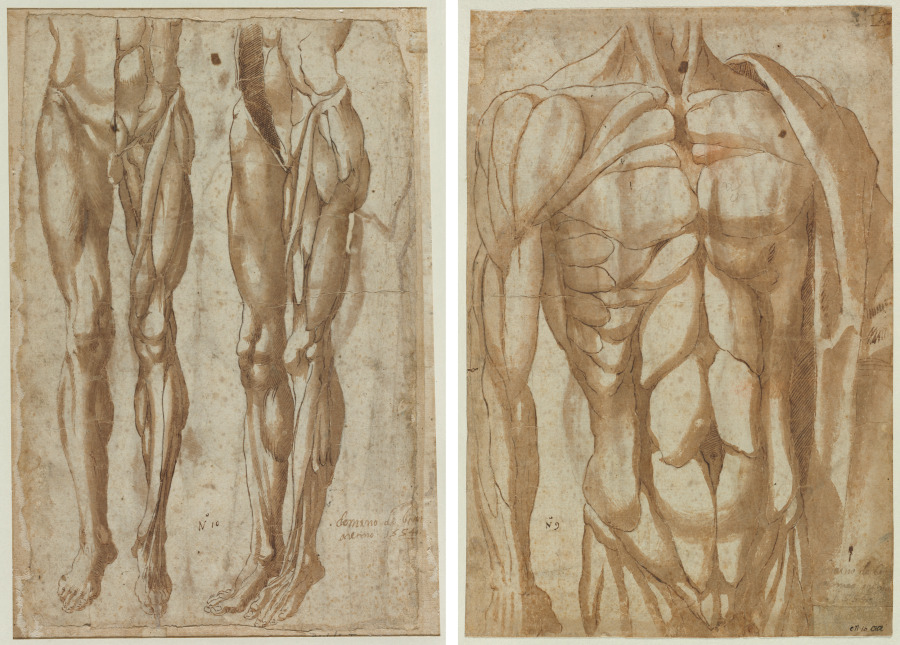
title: Two Studies of a Flayed Man (recto) Study of a Flayed Torso (verso)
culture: Italy, 16th century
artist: Bartolommeo da Arezzo (Italian, active about 1550–80)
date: 1554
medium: pen and brown ink and brush and brown wash over black chalk; incised (both figures) and pricked (left figure)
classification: Drawing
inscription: signed, lower right, in brown ink: demano de bart / aretino . 1554 . [underlined] ; by artist(?), lower center, in brown ink: N° 10 ; lower right, in graphite [Bartolo° T?] [partially masked]